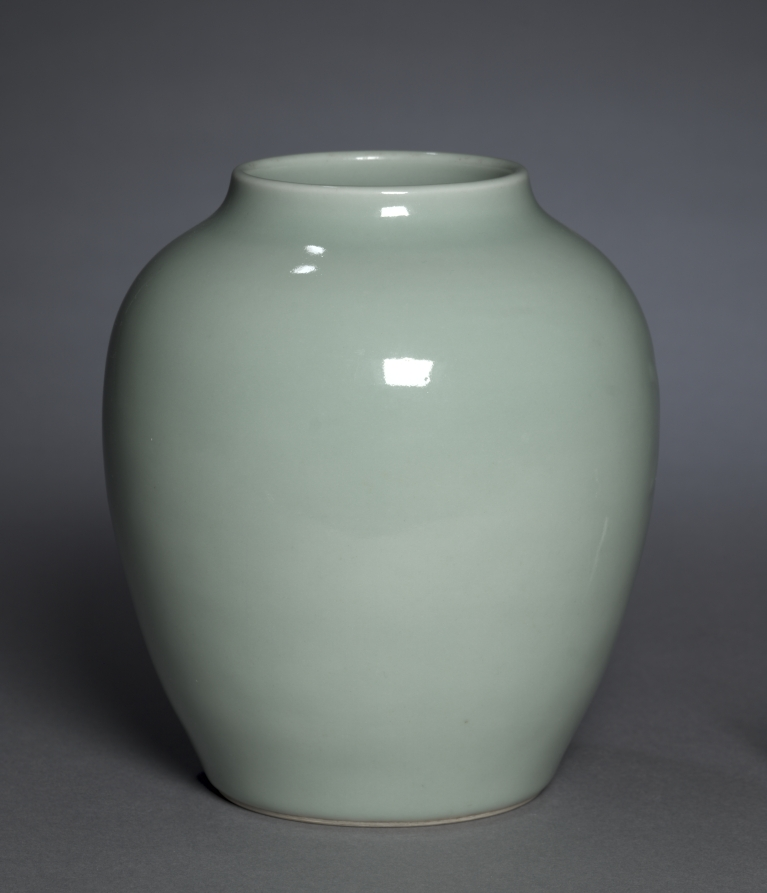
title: Jar with Crescents in Relief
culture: China, Jiangxi province, Jingdezhen kilns, Qing dynasty (1644-1911), Qianlong mark and reign (1736-95)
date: 1736–95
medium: porcelain with applied decoration and celadon glaze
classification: Ceramic